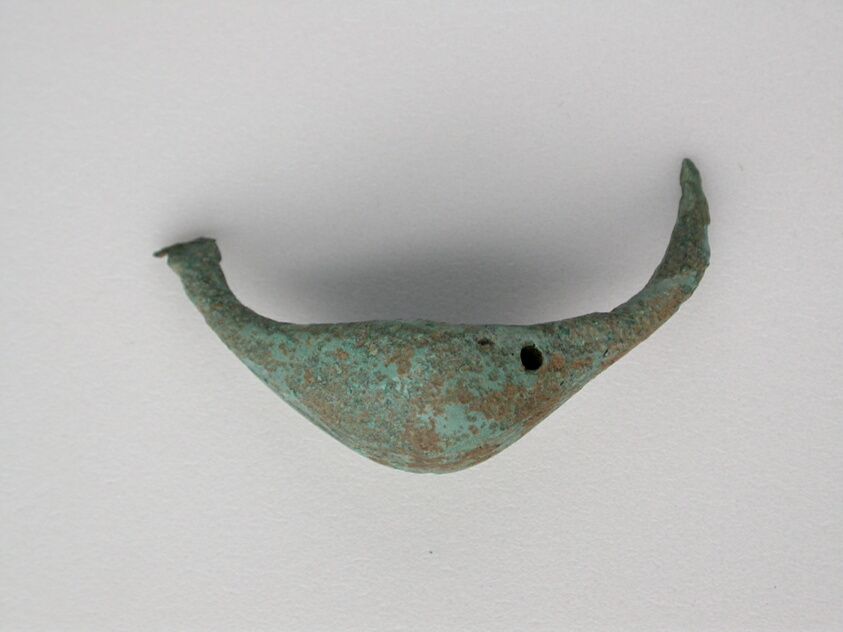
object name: Costume and Accessories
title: Fibula (leech type)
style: geometric, ancient, greek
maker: Greek; Thessaly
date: Geometric Period (800–700 BCE)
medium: Bronze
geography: Thessalía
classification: votive offering; ex-voto; fibula; costume